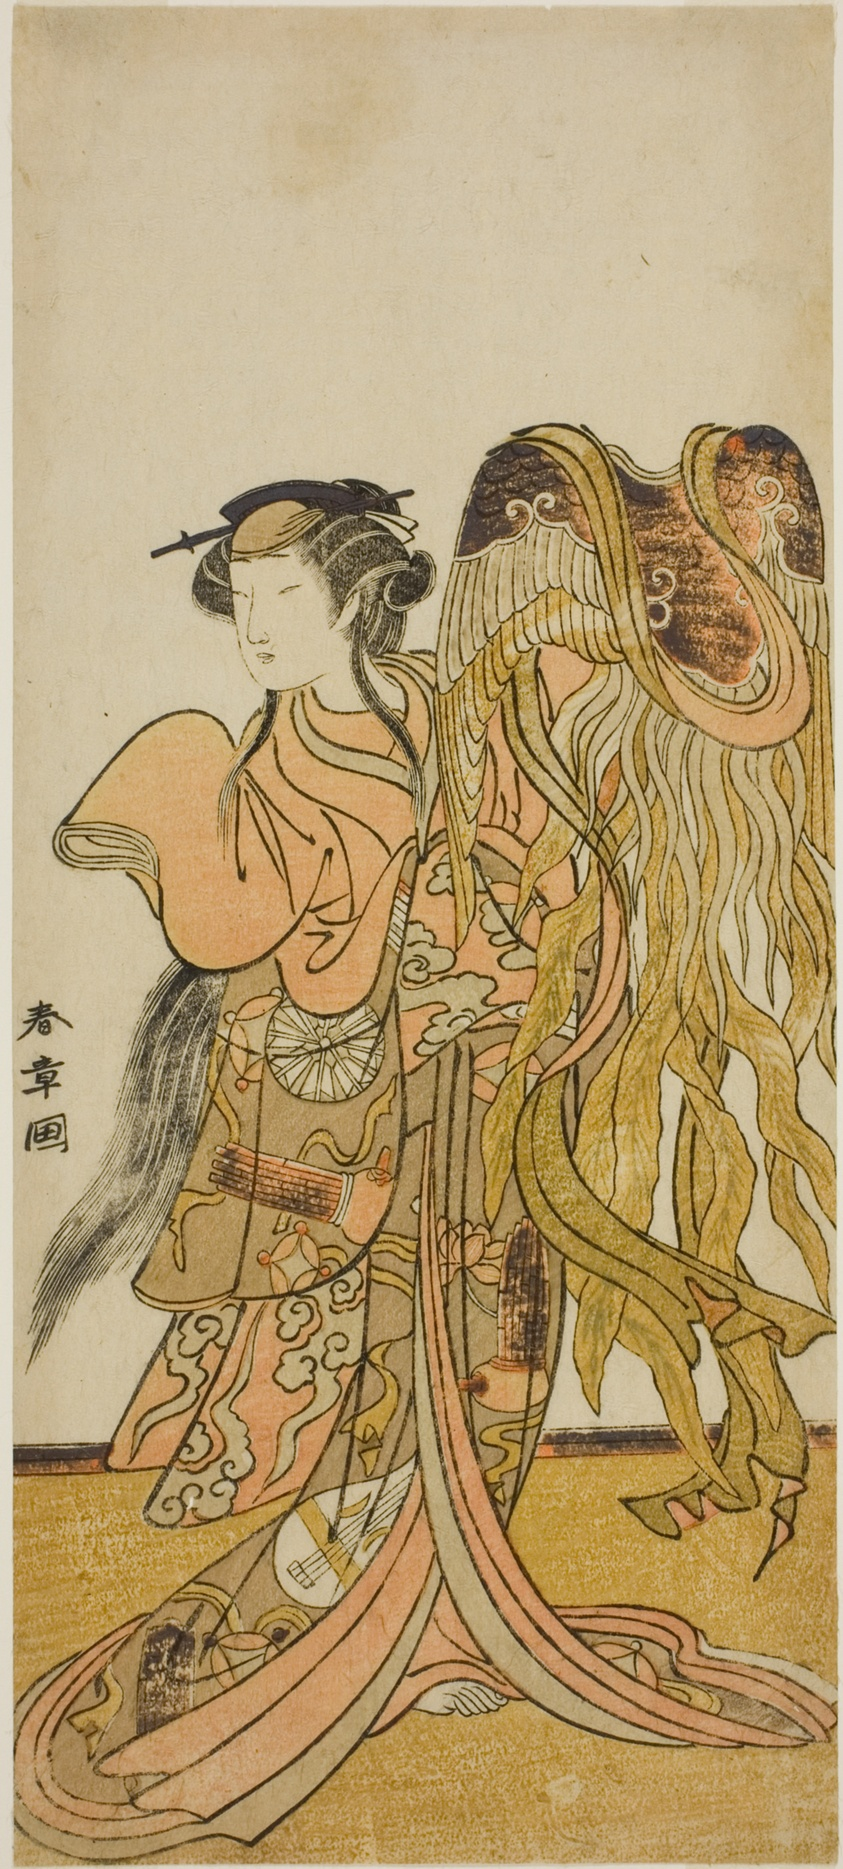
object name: Print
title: The Actor Nakamura Tomijuro I as the Courtesan Toyama of Tsuruga in the Play Keisei Tsuki no Miyako, Performed at the Morita Theater in the Eighth Month, 1775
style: Japanese (culture or style)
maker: Katsukawa Shunsho 勝川 春章; Japanese, 1726-1792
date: c. 1775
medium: Color woodblock print; hosoban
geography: Japan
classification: woodblock print; print; asian art